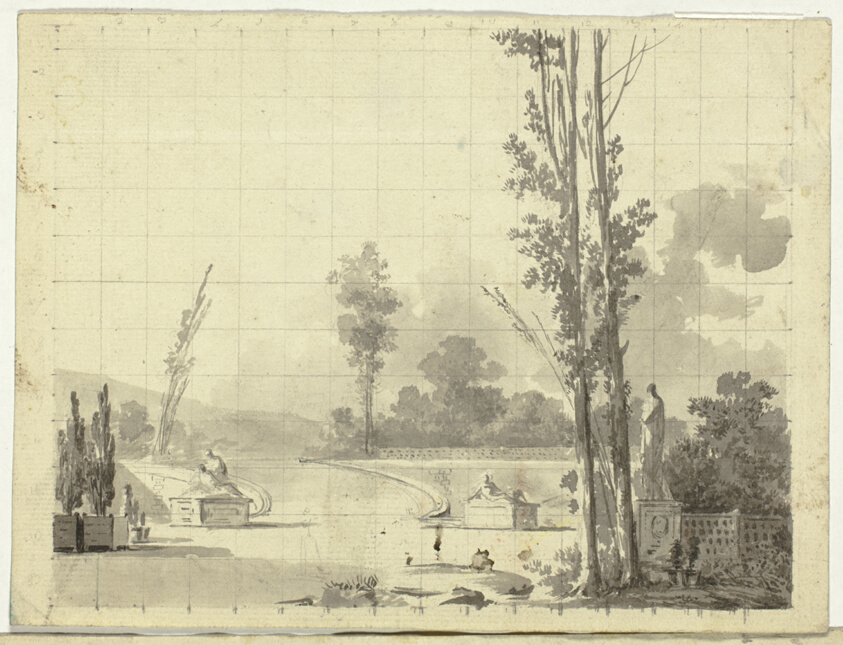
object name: Drawing and Watercolor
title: View of the Park at Versailles: Stairway and Two Poplars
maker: Pierre Antoine Mongin (French, 1761/62-1824/27)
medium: Brush and gray wash, with graphite, on cream laid paper, squared in graphite for transfer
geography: France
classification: ink or chalk wash; drawings (visual works); prints and drawing